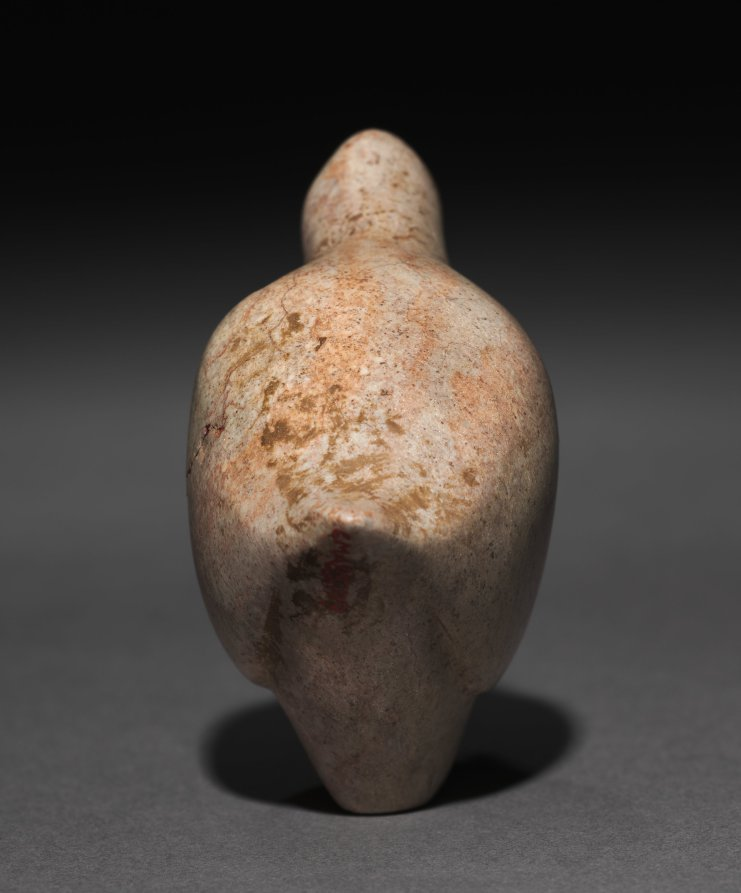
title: Nesting Quail Stamp Seal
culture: Iran, Lake Van region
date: 4000–3000 BCE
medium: dickite stone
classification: Sculpture